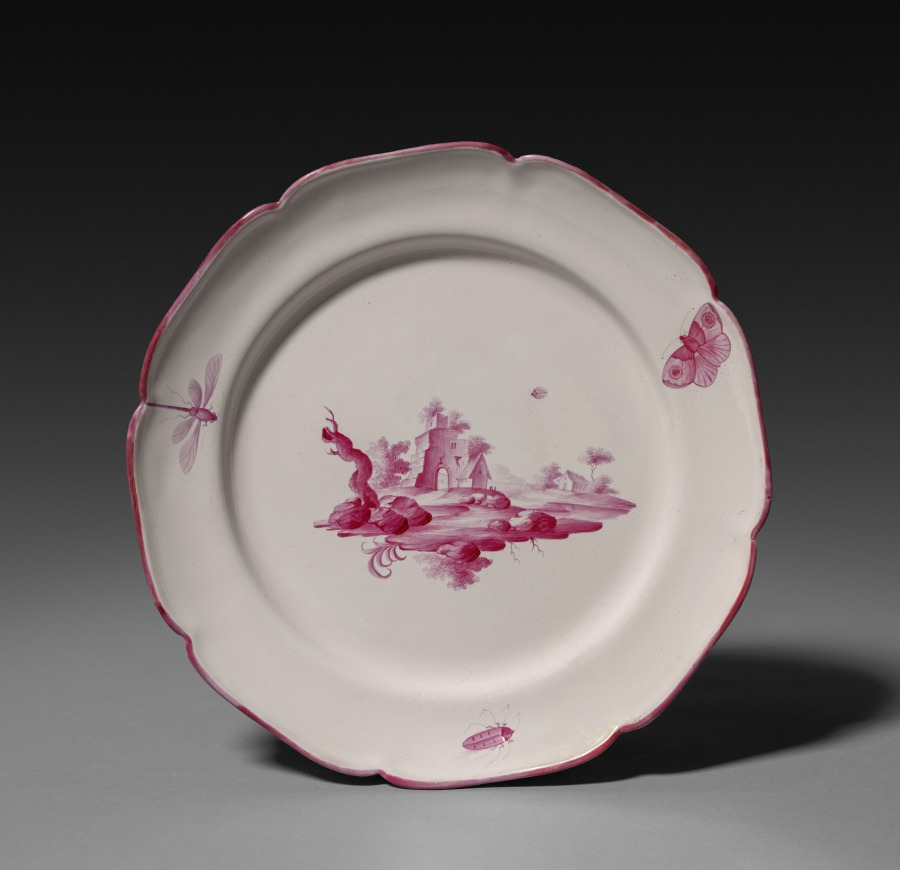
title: Plate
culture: France, 18th century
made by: Niderviller Factory (French)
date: c. 1780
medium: faience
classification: Ceramic